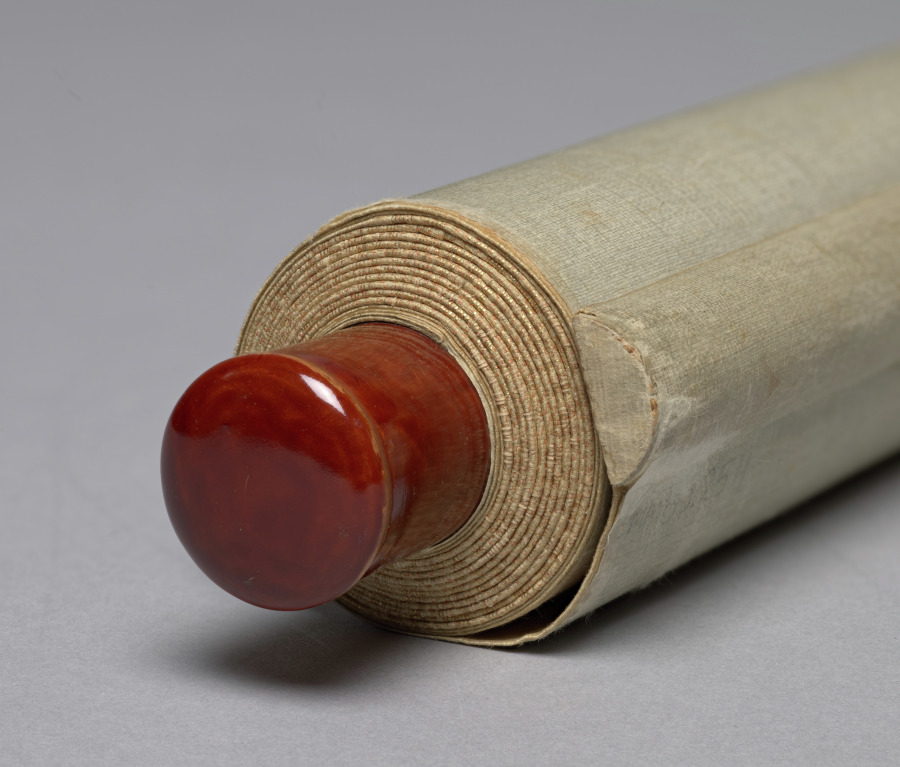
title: Beauty in a Boat on Sumida River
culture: Japan, Edo period (1615–1868)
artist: Chōbunsai Eishi (Japanese, 1756–1829)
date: c. 1801–4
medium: hanging scroll; ink and color on silk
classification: Painting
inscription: artist's signature 栄之筆 and seal, lower right.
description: The Sumida River was a popular refuge from the heat and humidity of the city during the summer. One can see the torii gate of Mimeguri Shrine just to the left of the woman's fan.